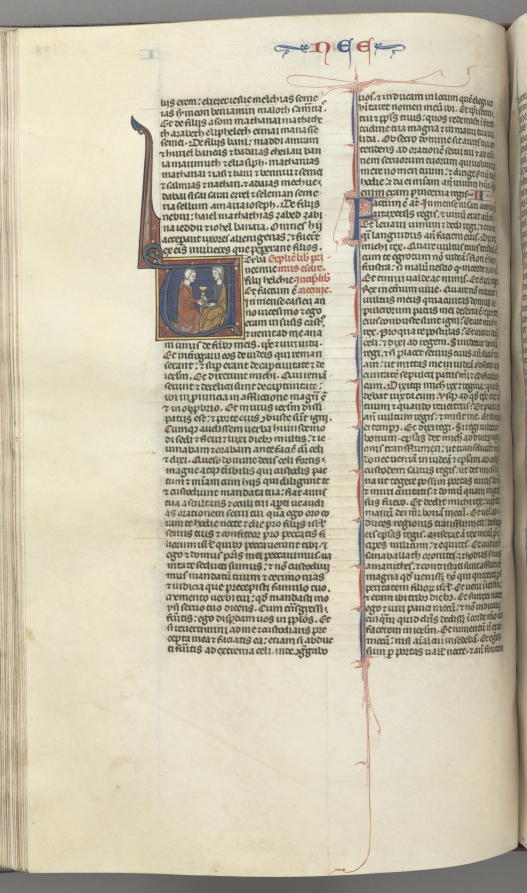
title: Fol. 178v, Nehemiah, historiated initial V, Nehemiah presenting the golden cup to Artaxerxes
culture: Southern France, Toulouse(?), 13th century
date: c. 1275–1300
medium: ink, tempera and gold on vellum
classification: Bound Volume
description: Biblical manuscripts were highly prized and important possessions of churches, monasteries, cathedral schools, and universities throughout medieval Europe. The biblical texts were known as the vulgate, the translations made by Saint Jerome in the fourth century from Hebrew and Greek into Latin, which became the definitive and official Latin version of the Roman Church. In the 13th century, the bible was, for the first time, produced as a single volume with an officially sanctioned sequence to its books and chapters as illustrated by this example. The very extensive decoration of this bible is arranged hierarchically to indicate the relative importance of the various texts so that full or almost full-page initials mark the openings of the first prologue, Genesis, and the first Gospel; historiated initials mark the beginning of each book and illuminated initials mark the Prologues.